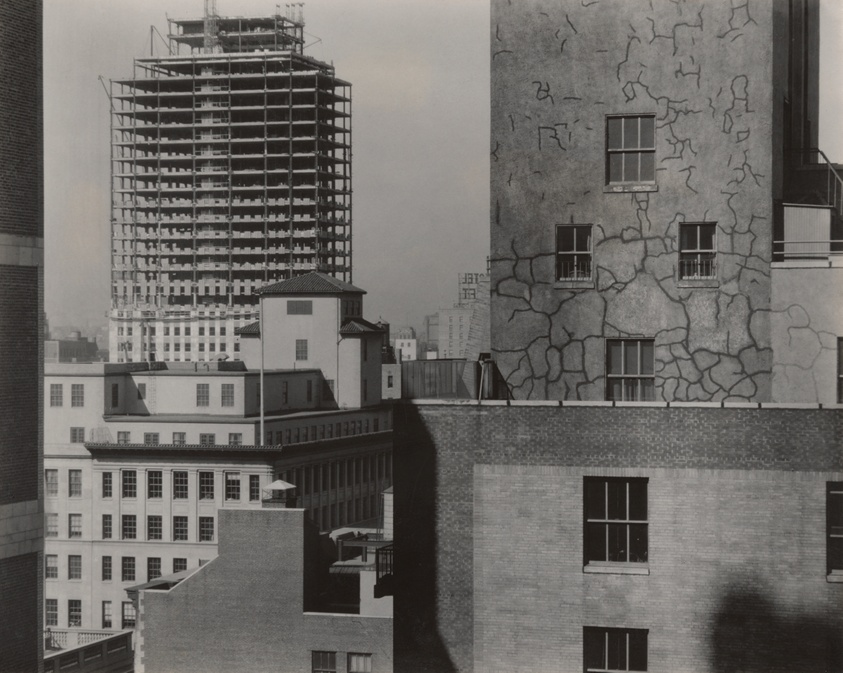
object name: Photograph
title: From My Window at An American Place, Southwest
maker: Alfred Stieglitz (American, 1864–1946)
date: 1932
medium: Gelatin silver print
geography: United States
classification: gelatin silver (developing-out-paper) pr; photographic process; photography; photograph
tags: cityscapes